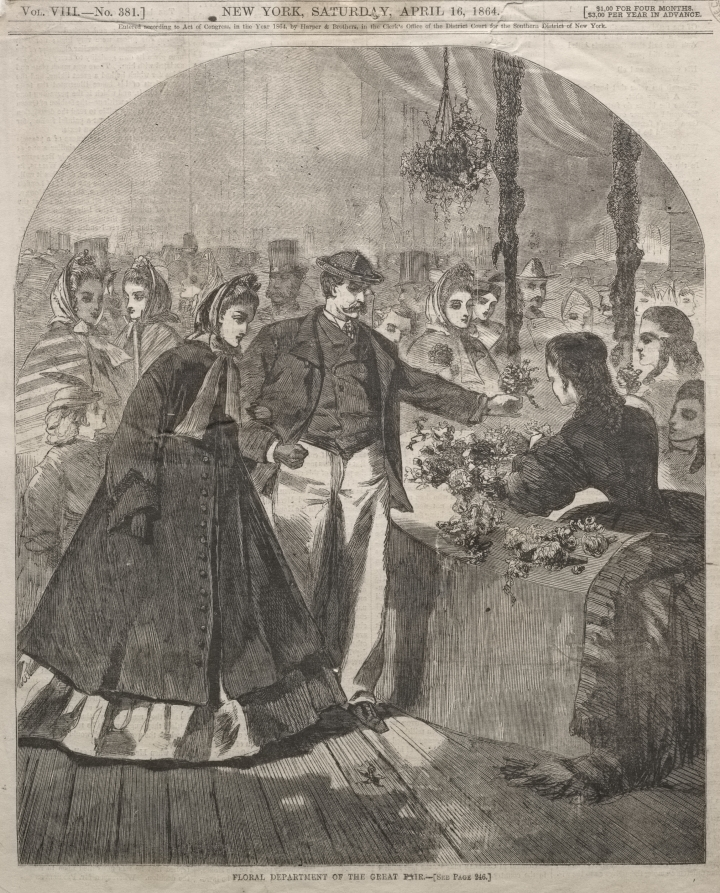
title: Floral Department of the Great Fair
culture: America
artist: Winslow Homer (American, 1836–1910)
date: 1864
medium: wood engraving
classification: Print